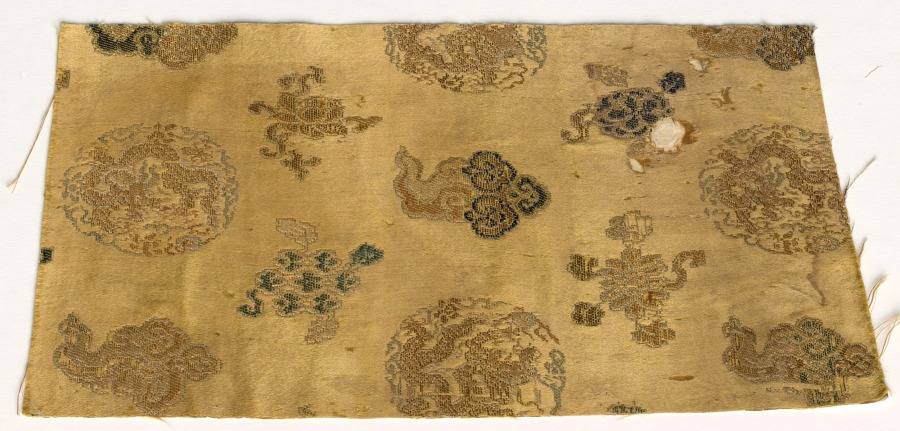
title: Fragment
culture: China, 18th century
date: 1700s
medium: brocaded satin, silk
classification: Textile